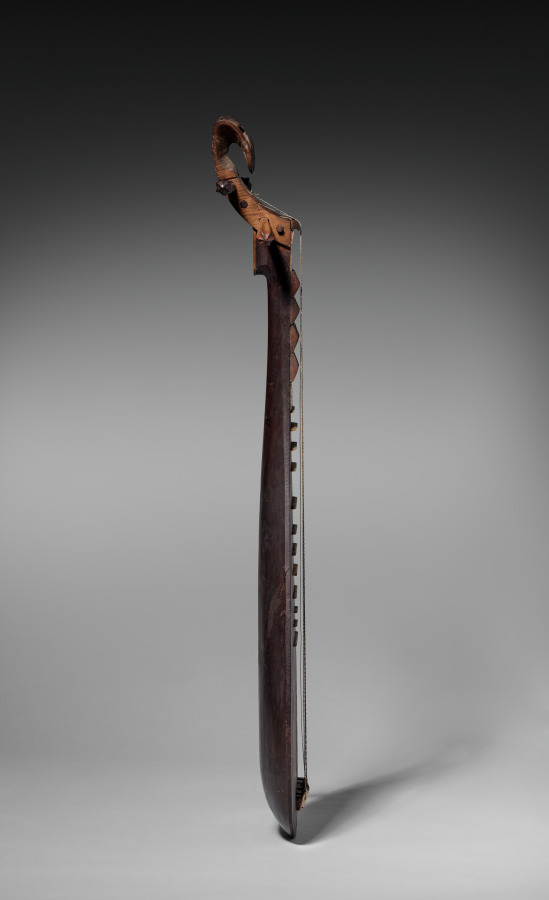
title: Pipa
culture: China, Qing dynasty (1644-1911)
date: 1800s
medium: Wood, ivory, bone, gut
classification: Musical Instrument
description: The term pipa, known since the 3rd century BC, describes the playing motion of the right hand: pi, “to play forward” (left), and pa, “to play backward” (right). A type of lute played with the fingers, it is used in opera and storytelling ensembles and has an impressive, virtuosic solo repertoire. Historic imagery, such as wall paintings, documents the spread of the pipa, along the Silk Road from western and central Asia to China. The bat finial here is a commonly used device on 19th-century Chinese lutes symbolizing good luck.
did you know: The string holder is made of bone.